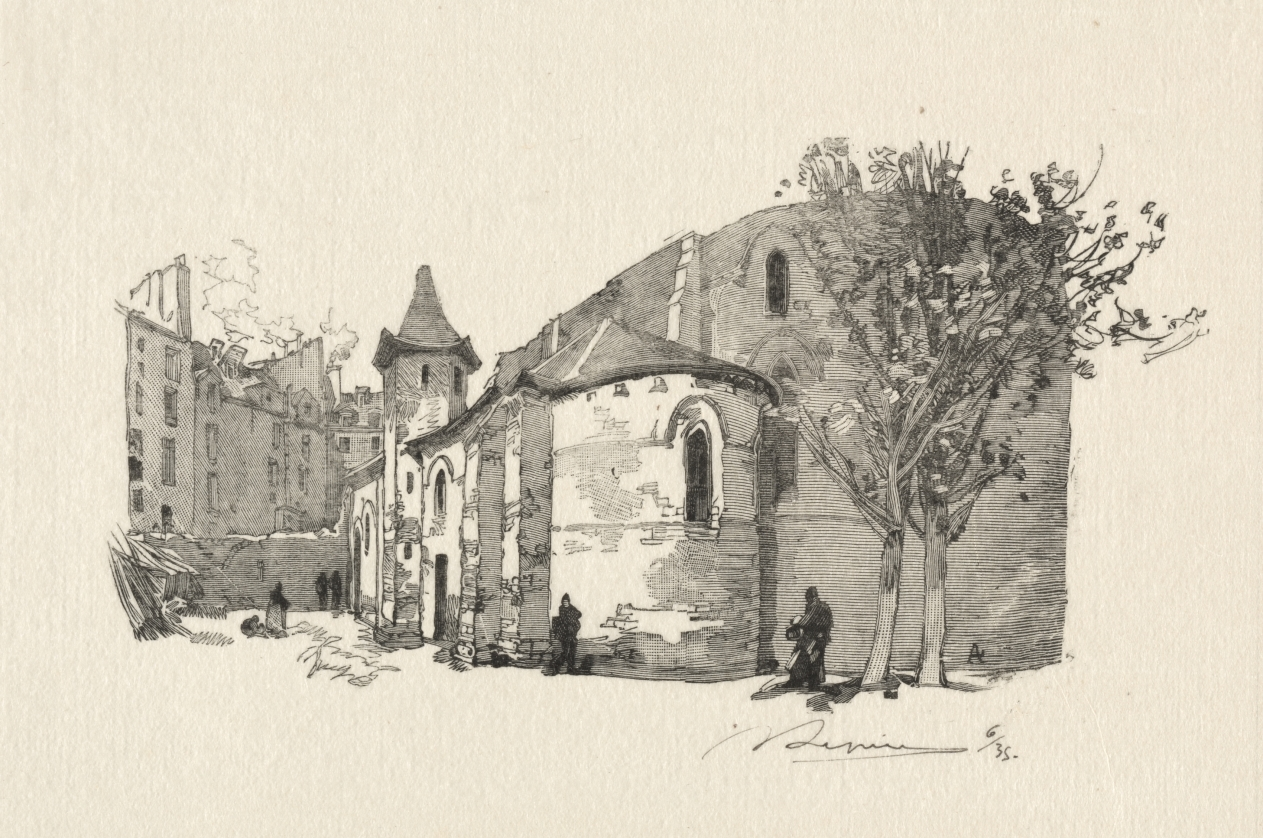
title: St. Julien le Vauvre, Vue extérieur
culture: France, 19th-20th century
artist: Auguste Louis Lepère (French, 1849–1918)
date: c. 1870–1918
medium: wood engraving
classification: Print